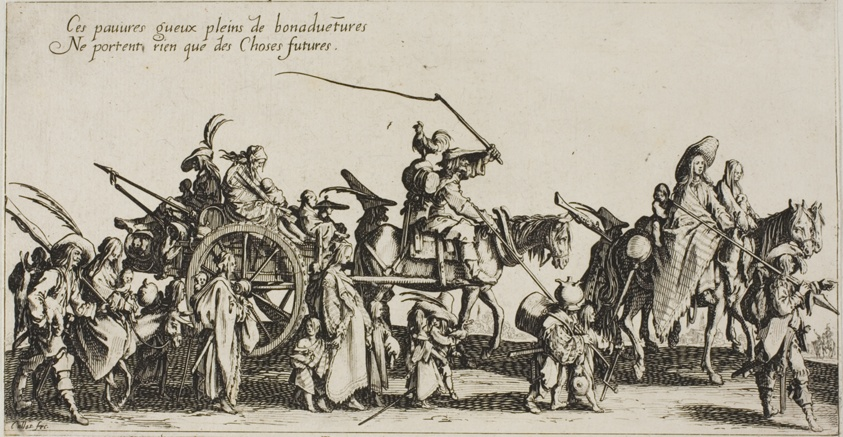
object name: Print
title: The Bohemians Marching: The Rear Guard, from The Bohemians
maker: Jacques Callot (French, 1592-1635)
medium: Etching with burin on paper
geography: France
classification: etching; print; prints and drawing